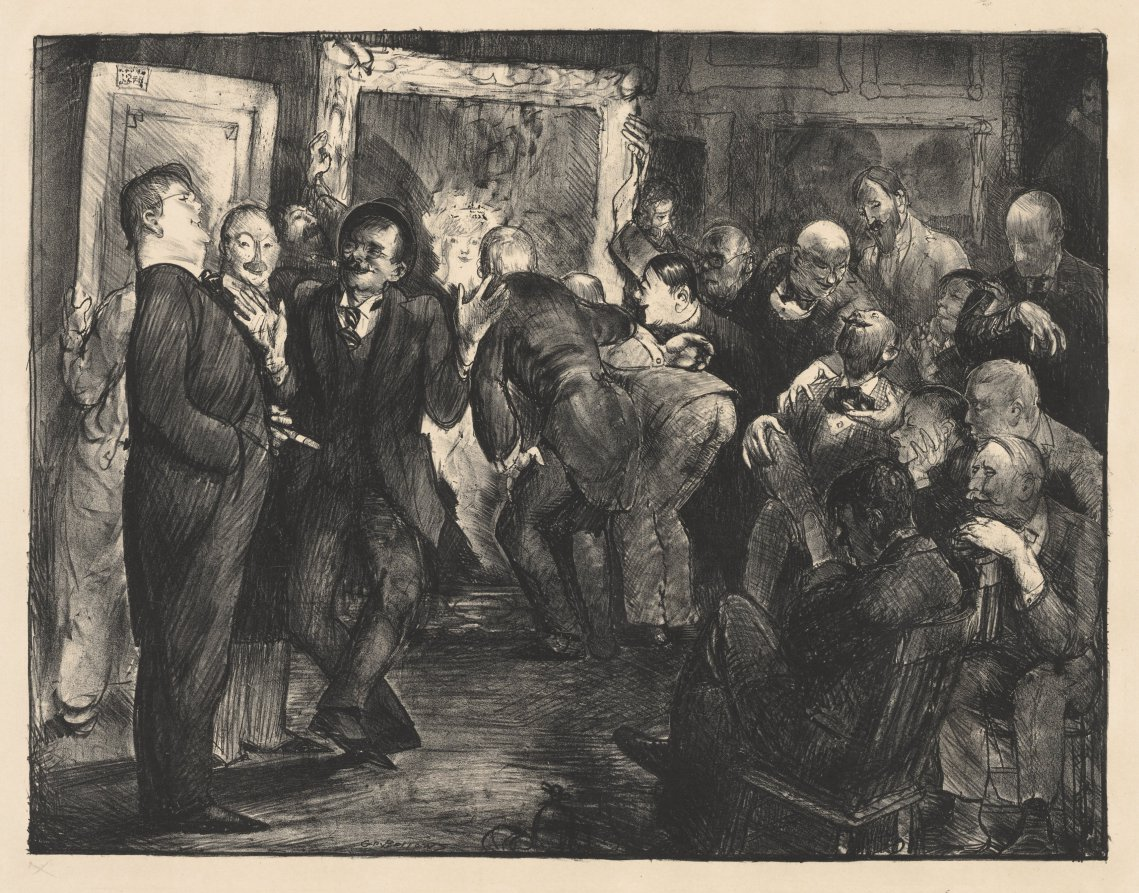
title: Artists Judging Works of Art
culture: America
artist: George Bellows (American, 1882–1925)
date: 1916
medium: lithograph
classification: Print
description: George Bellows made several prints about the artist’s life, and of this one he wrote, “The result of a young artist’s first service on an official jury. For fear of offense none of the ‘likenesses’ will be painted out. They are whoever they are.” The scene probably takes place at the National Arts Club, a gathering spot for the Ashcan artists, but Bellows may have been recalling his service on the planning committee of the New York Armory Show in 1912, an important international art exhibition. Bellows included a self-portrait at the upper right and a portrait of artist Robert Henri seated at the lower right.